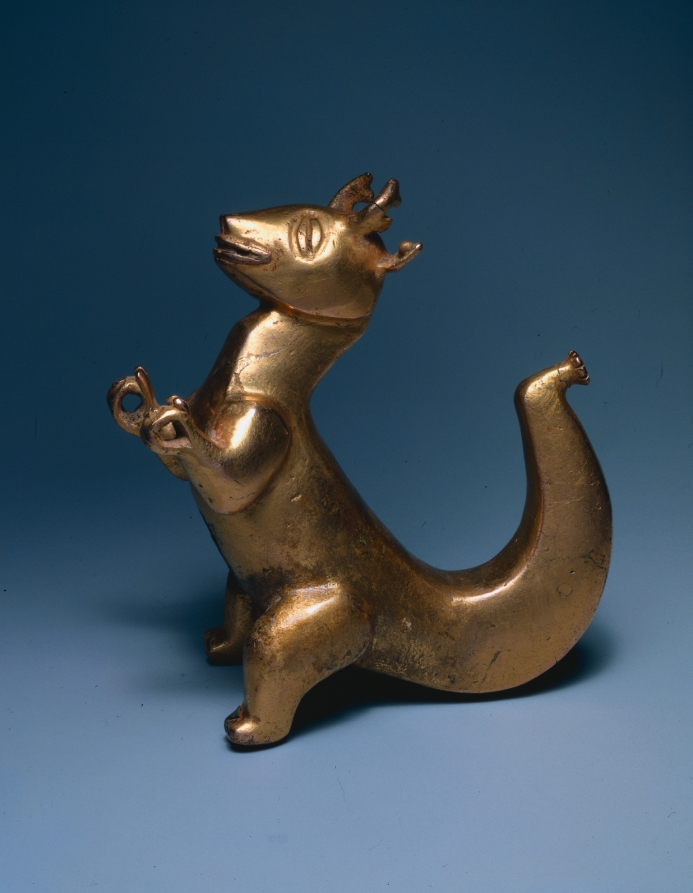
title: Pendant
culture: Panama, International style, 5th-7th century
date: 400–700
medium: cast gold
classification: Metalwork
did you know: Panning for gold was viewed as a sacred activity among the ancient inhabitants of Costa Rica and Panama.